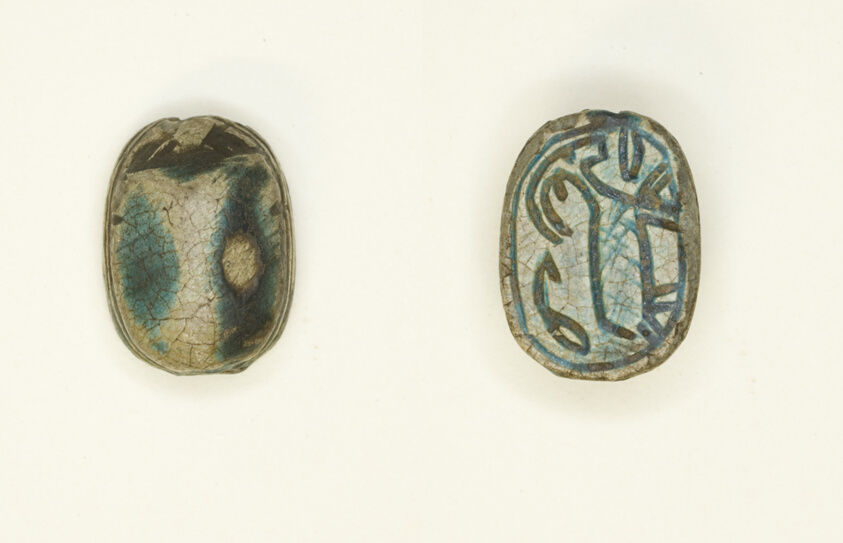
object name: Costume and Accessories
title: Scarab: Antelope with Foliage Motif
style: second intermediate period, egyptian, ancient, fifteenth dynasty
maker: Egyptian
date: Second Intermediate Period, Dynasty 15 (about 1650–1550 BCE)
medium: Glazed steatite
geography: Egypt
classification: scarab; amulet; ancient art; costume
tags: scarab beetle, insects, antelope